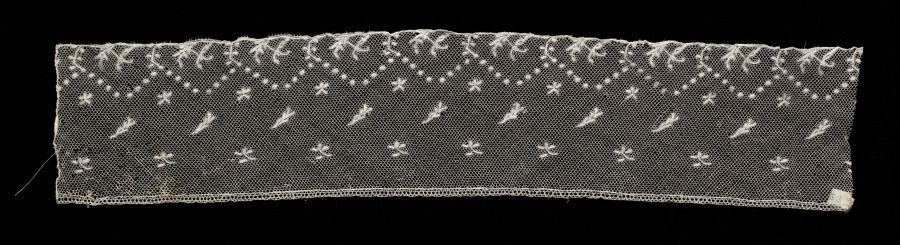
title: Fragment of Lace Edging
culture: France, Valenciennes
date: 1780–99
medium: Bobbin lace (Valenciennes)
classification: Lace